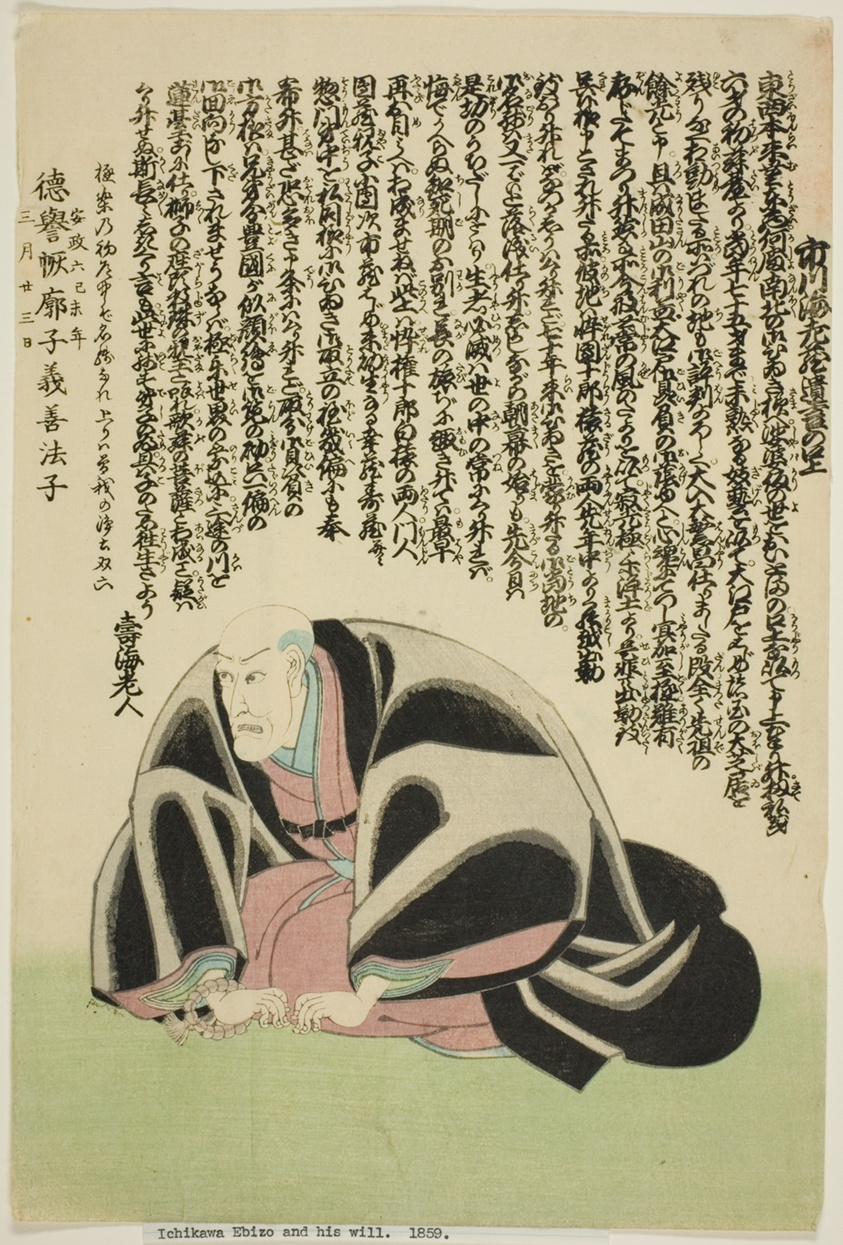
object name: Print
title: Memorial Portrait of the Actor Ichikawa Ebizo V (Danjuro VII)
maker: Utagawa School (Japanese, 19th century)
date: 1859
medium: Color woodblock print; oban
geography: Japan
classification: print; asian art